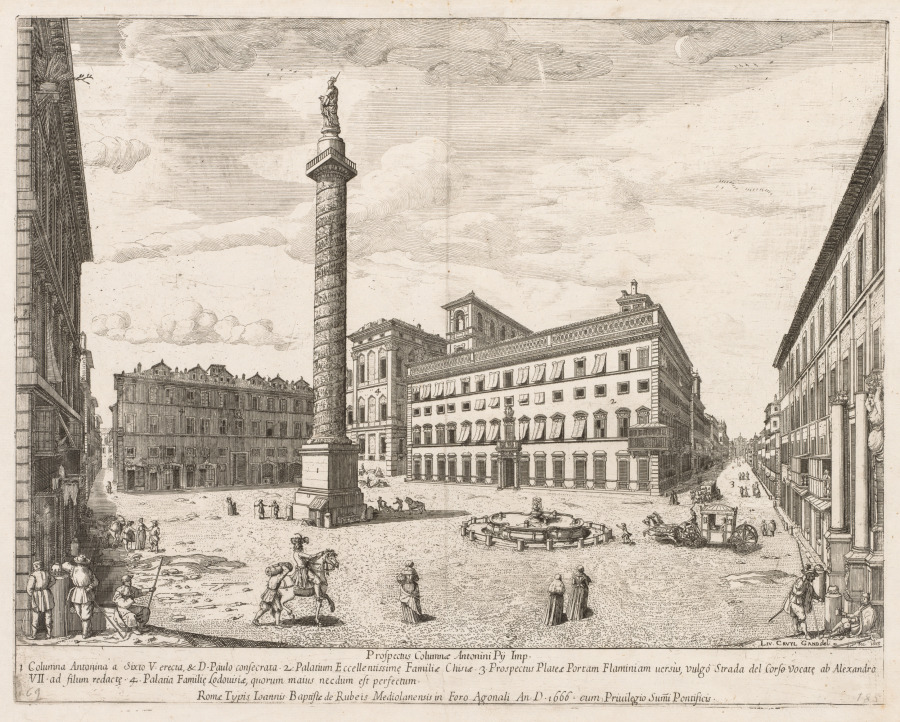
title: Piazza Colonna from "Prospectus Locurum Urbis Romae Insign[ium]"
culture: Flanders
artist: Lievin Cruyl (Flemish, c. 1640-c. 1720)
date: 1666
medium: etching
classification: Print